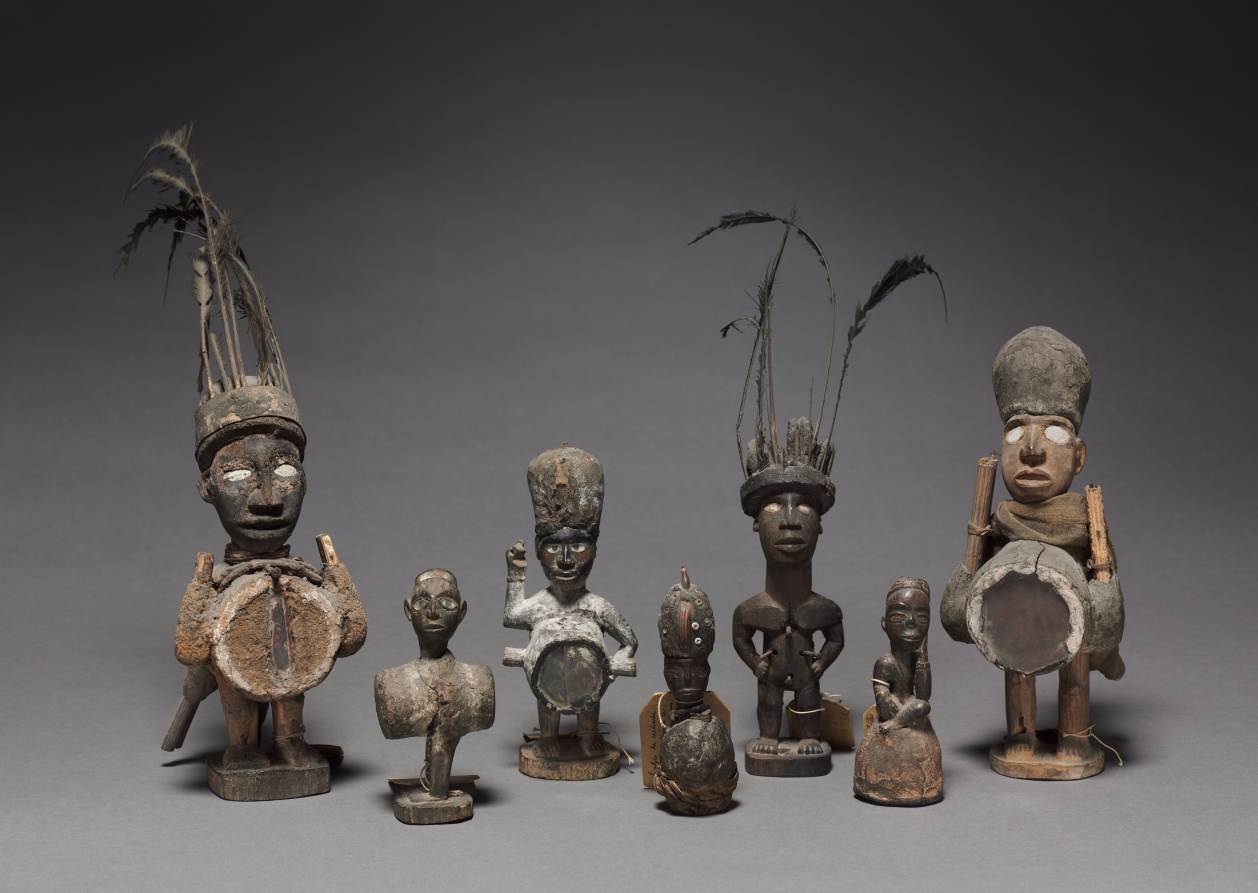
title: Power figure (nkisi)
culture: Central Africa, Republic of the Congo, Kongo people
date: late 1800s-early 1900s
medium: Wood, organic materials (including resin), iron, reed, tooth, seashell or glass beads, and possibly plastic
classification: Sculpture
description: One of seven anthropomorphic figurines, these minkisi contained medicines in which an ancestral spirit was believed to reside. Minkisi were objects of communal use; if conflict arose between two citizens, the Nkisi figure, along with the nganga (ritual leader) helped resolve the dispute. This small figure belonged to “the sorcerer of Loango,” chief of all sorcerers of that region (a province and port in West Central Africa).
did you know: This small figure belonged to “the sorcerer of Loango,” chief of all sorcerers of that region (a province and port in West Central Africa).